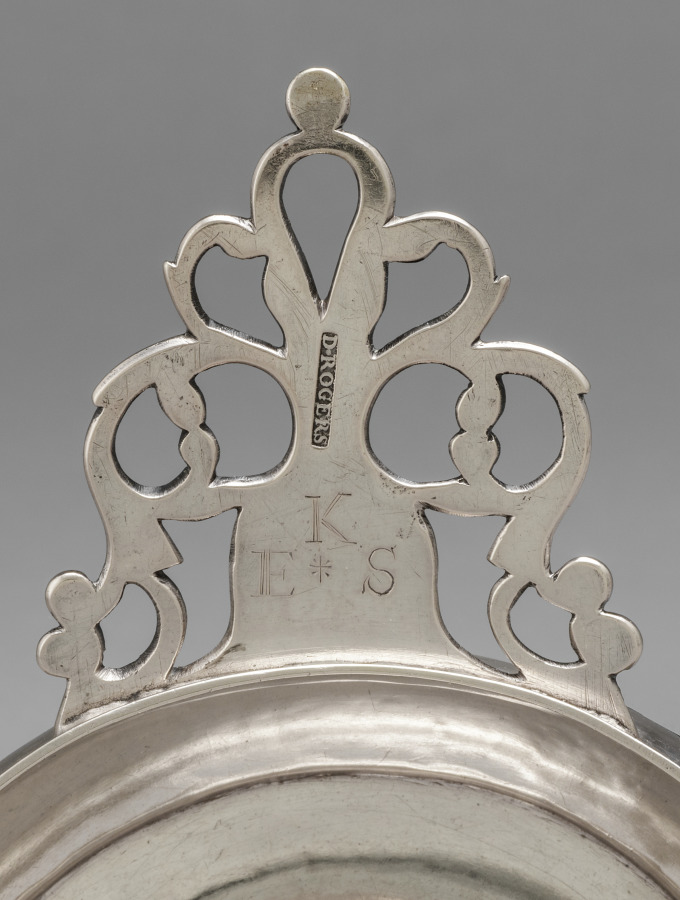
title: Porringer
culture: America, Massachusetts, Ipswich, 18th century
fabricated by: Daniel Rogers (American, 1735–1816)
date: c. 1760–1780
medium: silver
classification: Silver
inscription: engraved "K" over "E * S" in shaded block letters on top of handle. Scratched on bottom: "9 4 : 0."